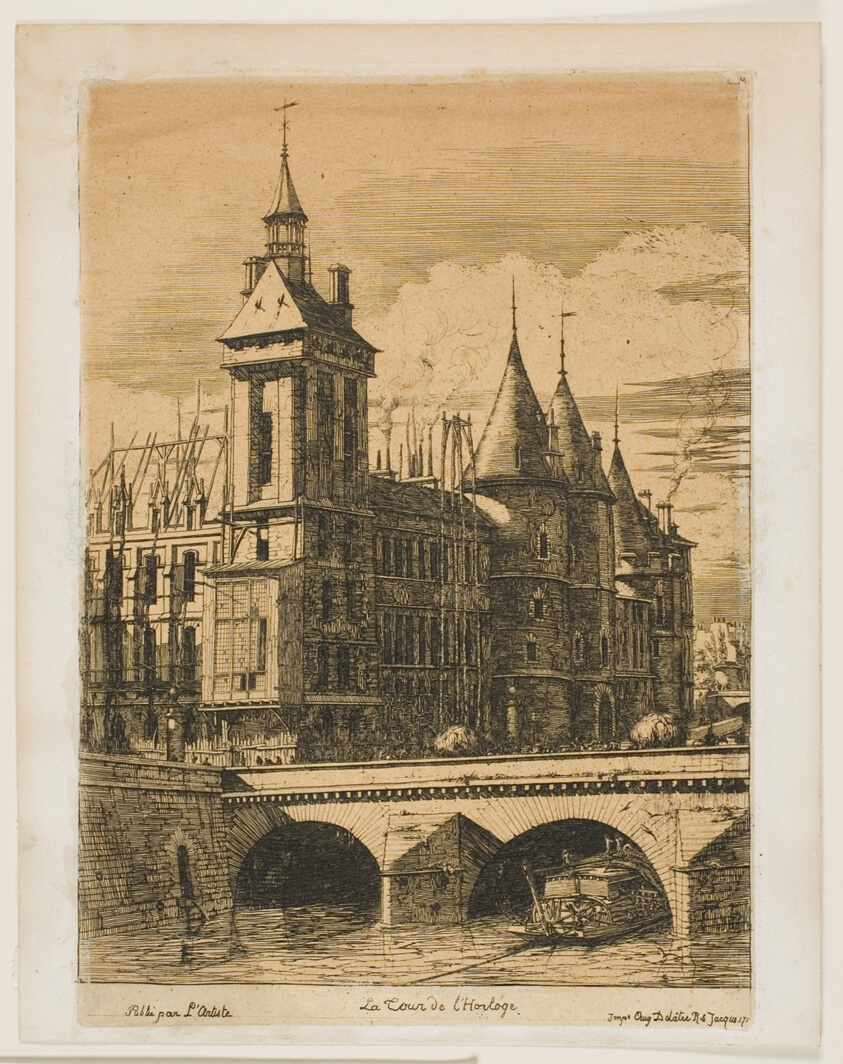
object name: Print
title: The Clock Tower, Paris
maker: Charles Meryon (French, 1821-1868); printed by Auguste Delâtre (French, 1822-1907); published by L'Artiste (French, 1831-1904)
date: 1852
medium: Etching and engraving on tan wove chine, laid down on ivory wove paper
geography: France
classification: etching; print; prints and drawing